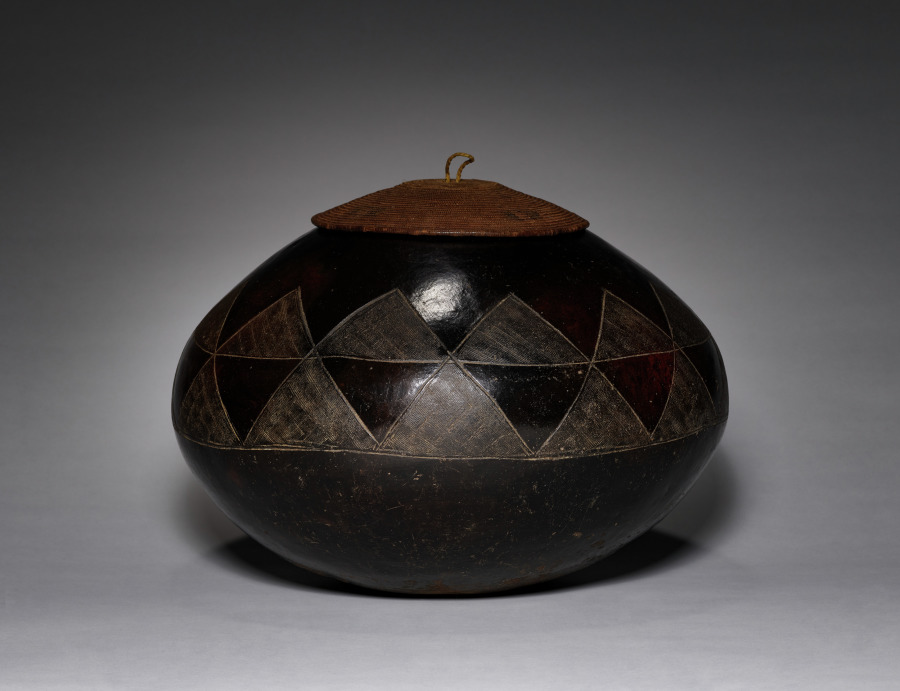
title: Lidded Pot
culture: Southern Africa, South Africa, Zulu, mid-20th century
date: 1900s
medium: Terracotta and plant fiber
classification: Vessels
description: This large, beautifully shaped vessel was used for the serving of beer, an essential component of Zulu hospitality. Undecorated vessels were for private household use, and ornamented examples were reserved for guests. Zulu pottery is produced by women, and is typically thin-walled, with a burnished black surface. Decoration may be incised around the shoulder, as in this example, or may consist of raised bumps that resemble body scarification. The basketry lid protects the vessel's contents from flies or debris; contemporary pot lids are often woven of telephone wire with a colorful plastic coating